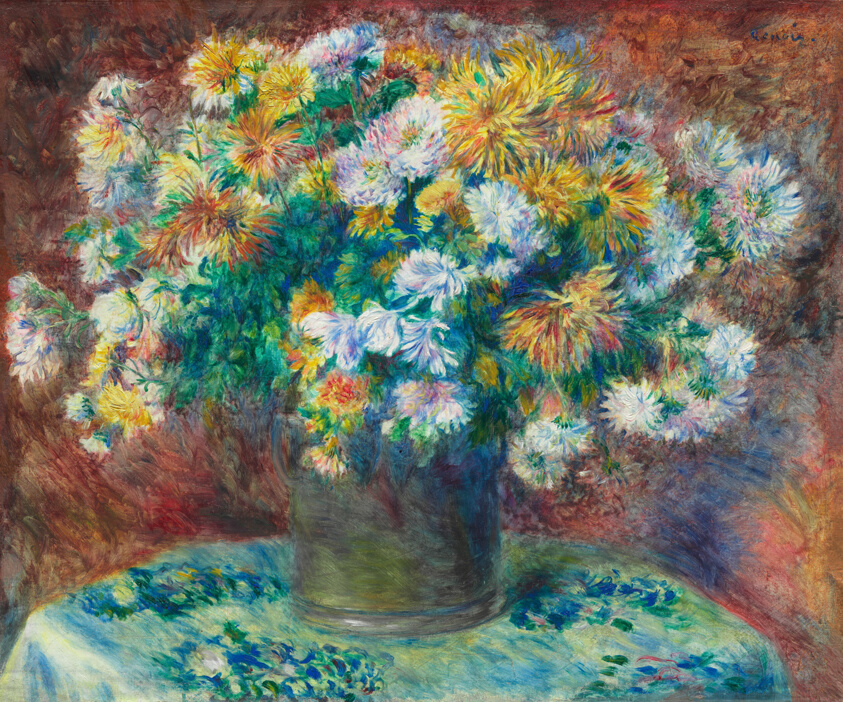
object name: Painting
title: Chrysanthemums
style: Impressionism, nineteenth century, 19th century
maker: Pierre-Auguste Renoir (French, 1841–1919)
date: 1881–82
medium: Oil on canvas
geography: France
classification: painting; still life; paint; oil paintings (visual works); oil on canvas; french; european painting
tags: chrysanthemums, yellow (color), white (color), vase, table, red (color), leaves, leaf, green (color), foliage, flowers, floral, flora, orange (color), still life, Century of Progress, world's fairs, Chicago World's Fairs